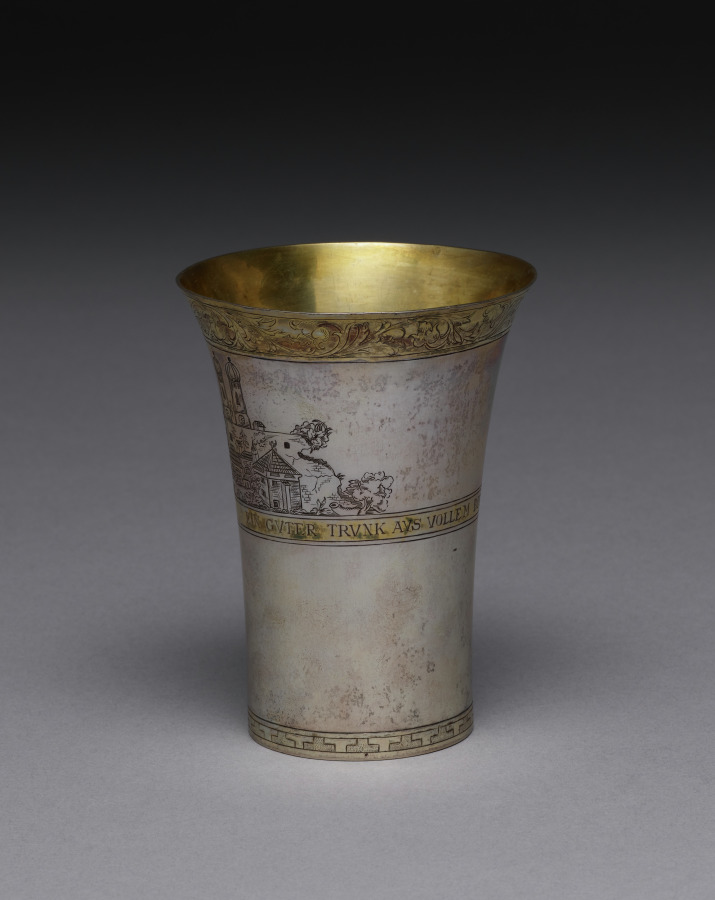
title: Beaker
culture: Germany, Munich, mid-18th century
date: mid 1700s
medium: silver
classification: Silver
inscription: Engraved around side: "EIN GVTER TRVNK AUS VOLLEM BECHER -- DAS IST DER BESTE SORGENBRECHER."